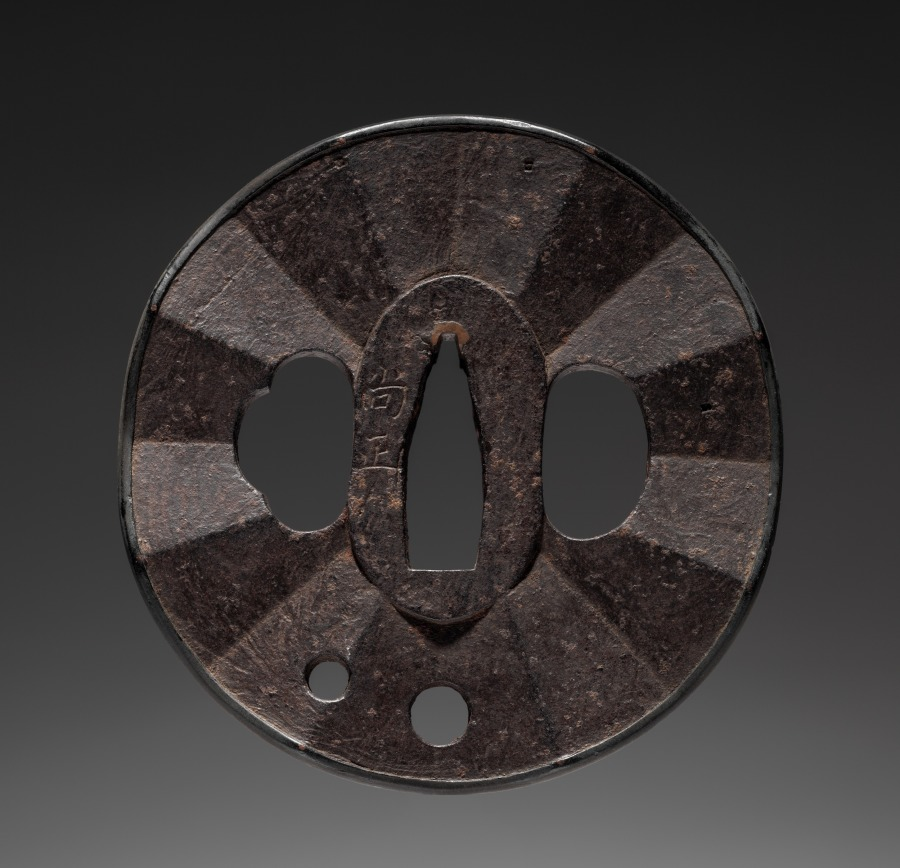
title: Sword Guard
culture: Japan, Edo period (1615–1868)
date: late 1700s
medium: iron with gold inlay (Myochin type)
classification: Arms and Armor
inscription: signed "Naomasa."